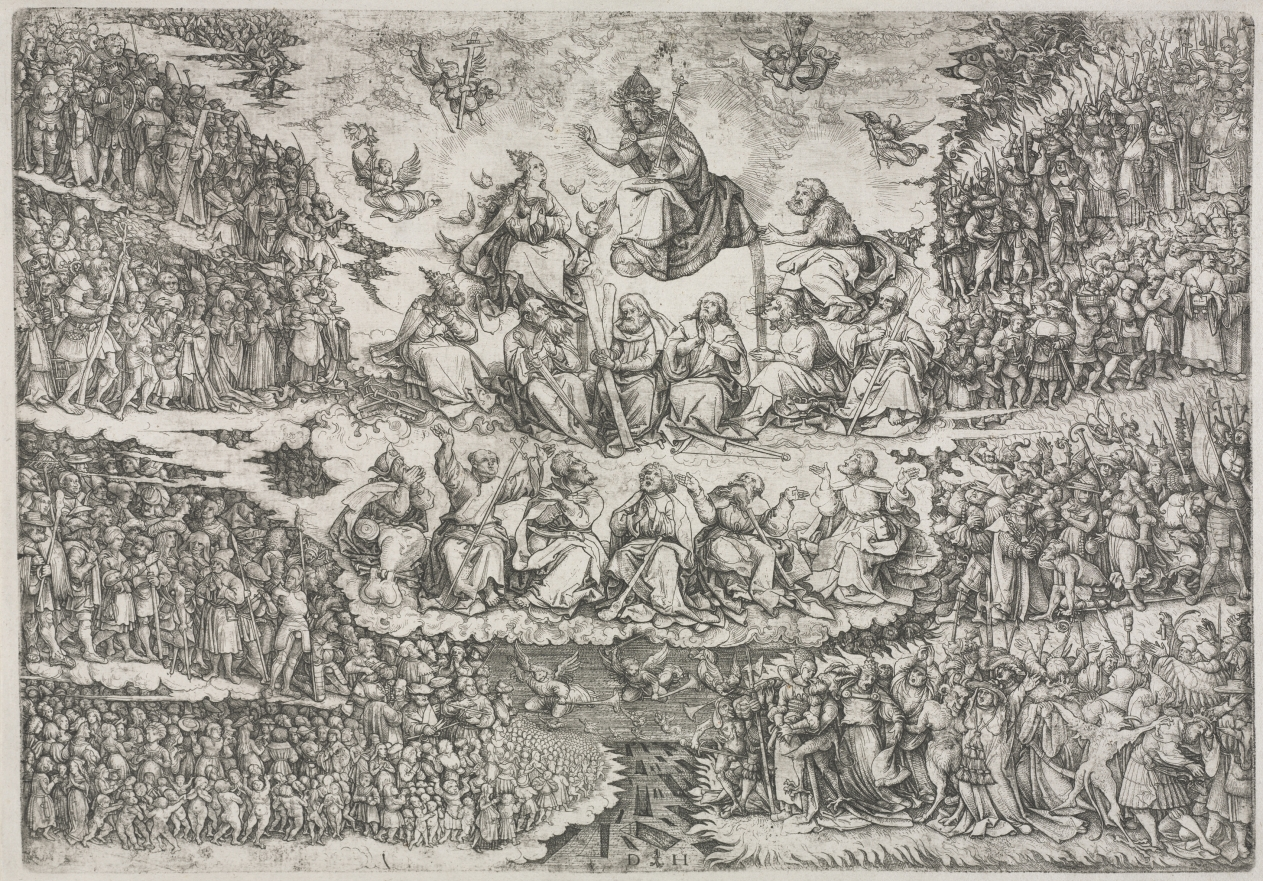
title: Last Judgment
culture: Germany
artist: Daniel Hopfer (German, c. 1470–1536)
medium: etching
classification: Print